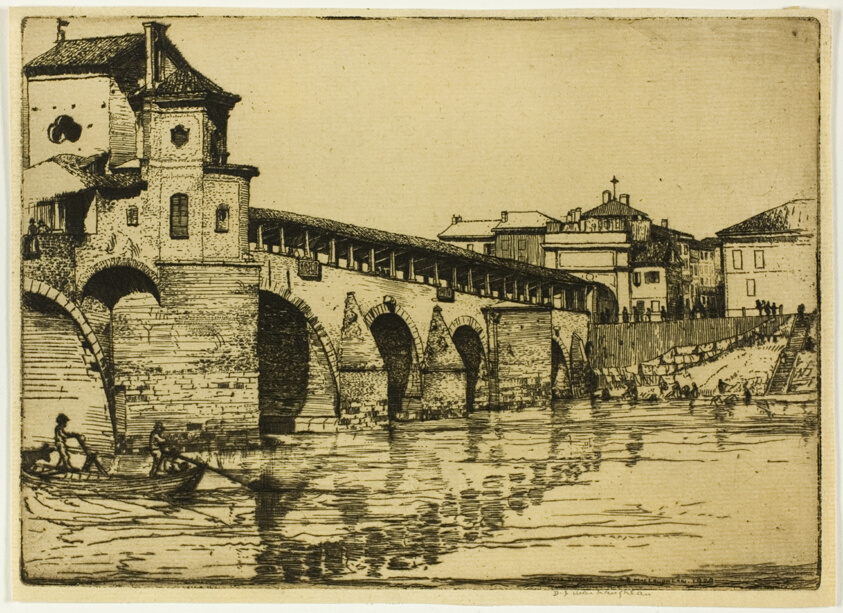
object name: Print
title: Ponte Ticino, Pavia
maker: Donald Shaw MacLaughlan (American, born Canada, 1876-1938)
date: 1904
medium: Etching in black on cream laid paper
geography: United States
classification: etching; print; prints and drawing